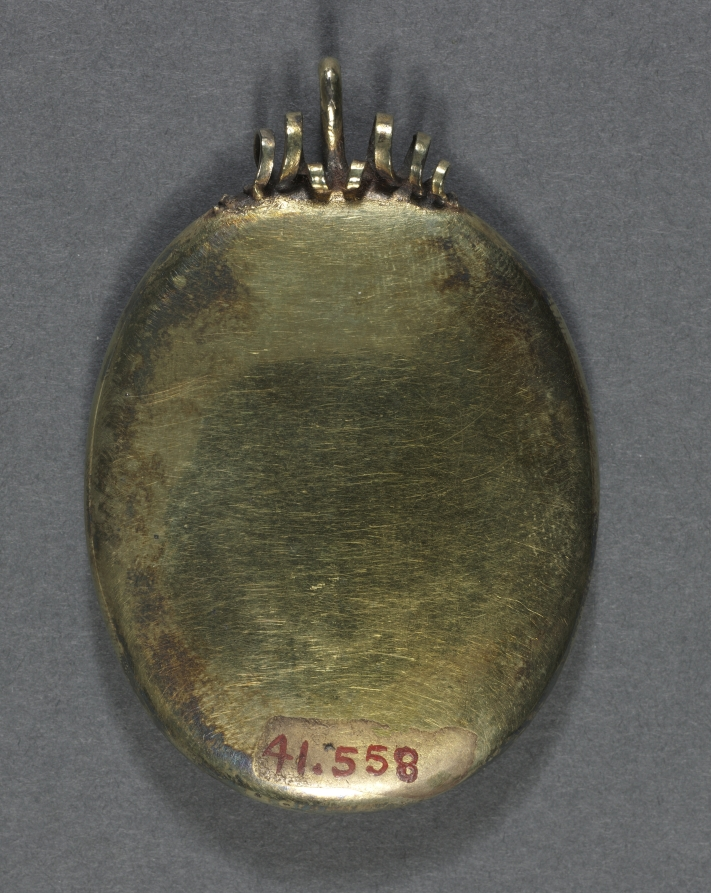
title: Portrait of a Man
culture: England, 17th century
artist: John Hoskins (British, c. 1590–1665)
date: c. 1625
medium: watercolor on vellum with gold border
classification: Portrait Miniature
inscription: signed left: IH [monogram]